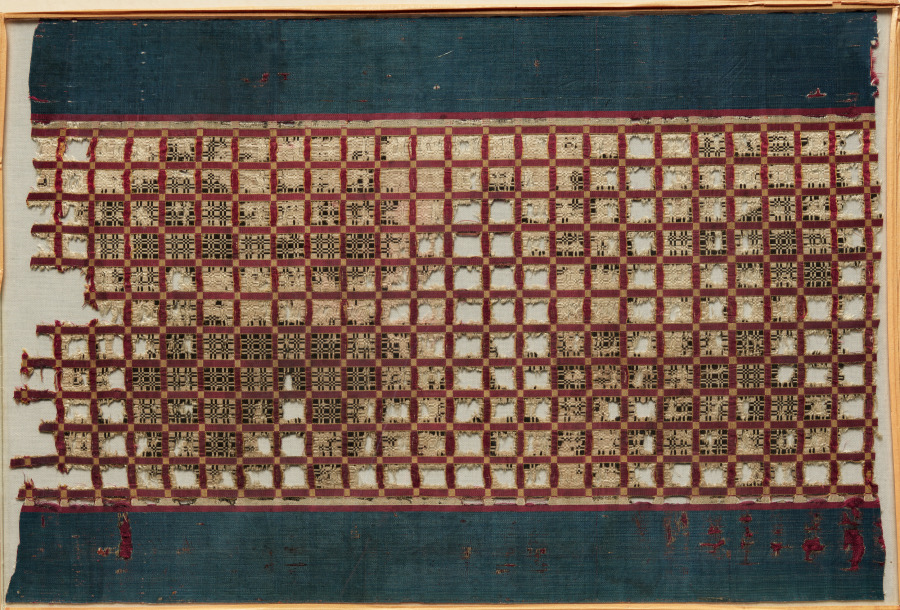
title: Wall Hanging (msimsim)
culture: Africa, North Africa, Morocco, Moroccan weaver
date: 1600s–1800s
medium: silk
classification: Textile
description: Woven silk msimsim wall hangings are made in the Moroccan city of Tétouan, and gifted by a groom to his bride. It is composed of both compound tabby and double tabby weave. Now highly damaged and missing much of its threads, this textile would be placed over a doorway within the new home. Its traditional design is a double-sided gridded brocade (raised woven pattern), navy on one side, crimson on the other.